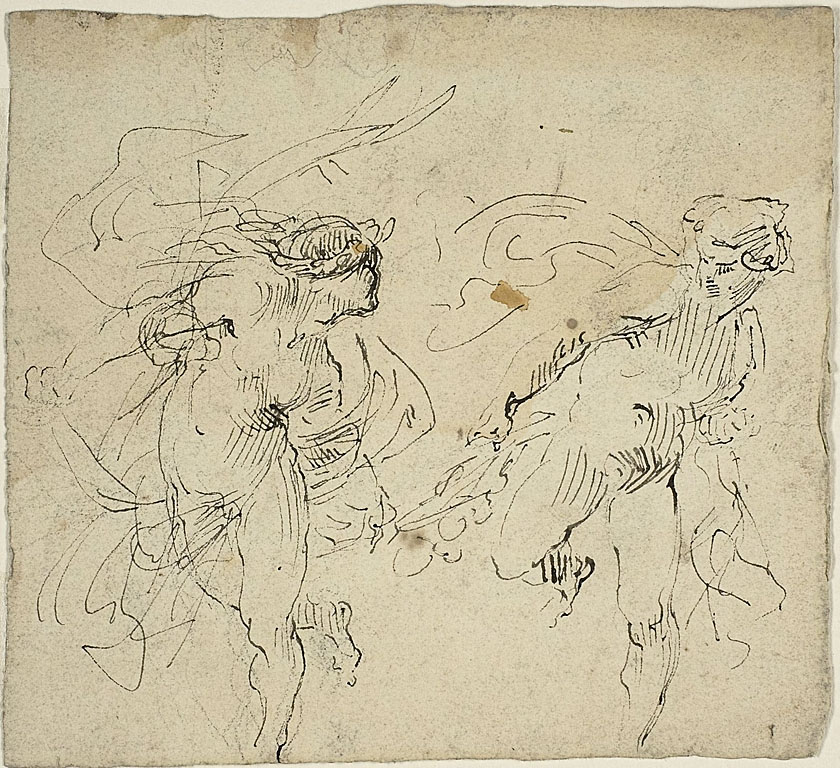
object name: Drawing and Watercolor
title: Two Running Male Figures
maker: Jean Baptiste Carpeaux (French, 1827-1875)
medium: Pen and brown ink, over traces of graphite, on cream wove paper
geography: France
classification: pen and ink drawings; drawings (visual works); prints and drawing